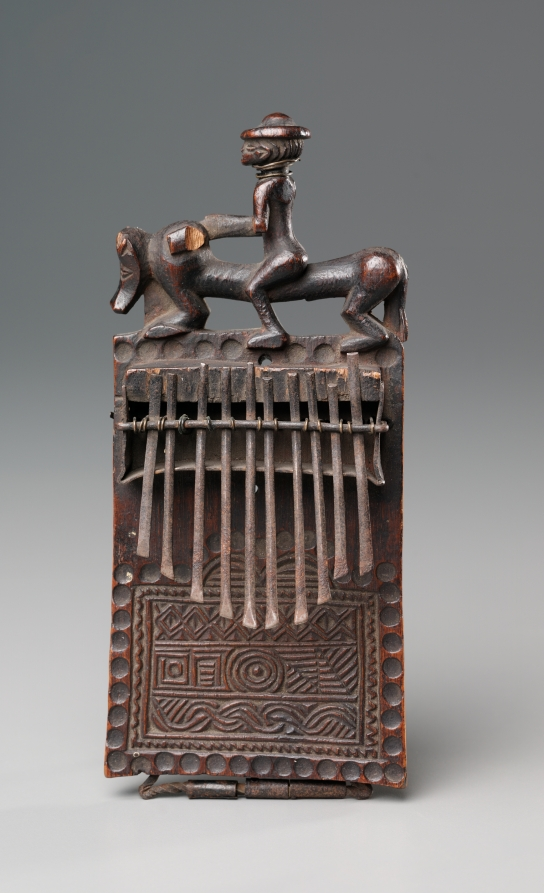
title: Lamellophone (chisanji)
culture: Africa, Central Africa, Democratic Republic of the Congo or Angola, Chokwe-style maker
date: late 1800s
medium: Wood, iron, and wire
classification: Musical Instrument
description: The thumb piano portrays a wonderfully animated man riding a curious quadruped. His hat suggests he is probably a trader (pombeiro) engaged in long-distance commerce.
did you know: The CMA acquired this plucky instrument in 1915, one year before it opened to the public.